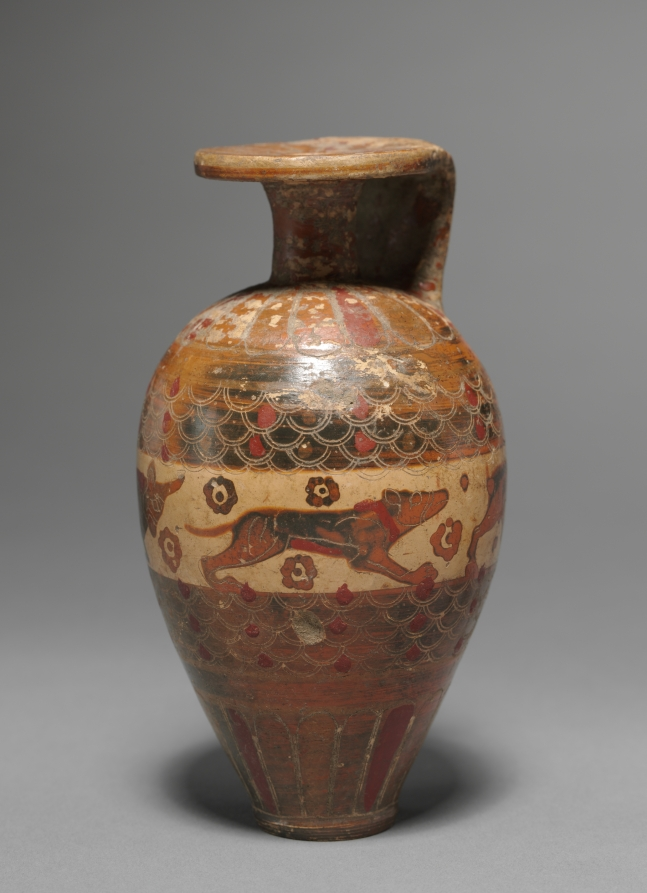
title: Protocorinthian (Early Black-Figure) Aryballos (Oil Flask): Animals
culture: Greek, Corinthian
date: c. 650–640 BCE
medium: ceramic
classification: Ceramic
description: Tongues encircle the rim, shoulder, and base of this small oil vessel, while two carefully incised bands of scales frame an animal frieze. Here, amid dot rosettes, are a bull, dog, and goat, all facing right, and a left-facing lion with head turned back. The black glaze has misfired red in many places, while added red enlivens numerous tongues, scales, and internal details.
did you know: Artists may have used a compass-like tool to create the intricate scale patterns.